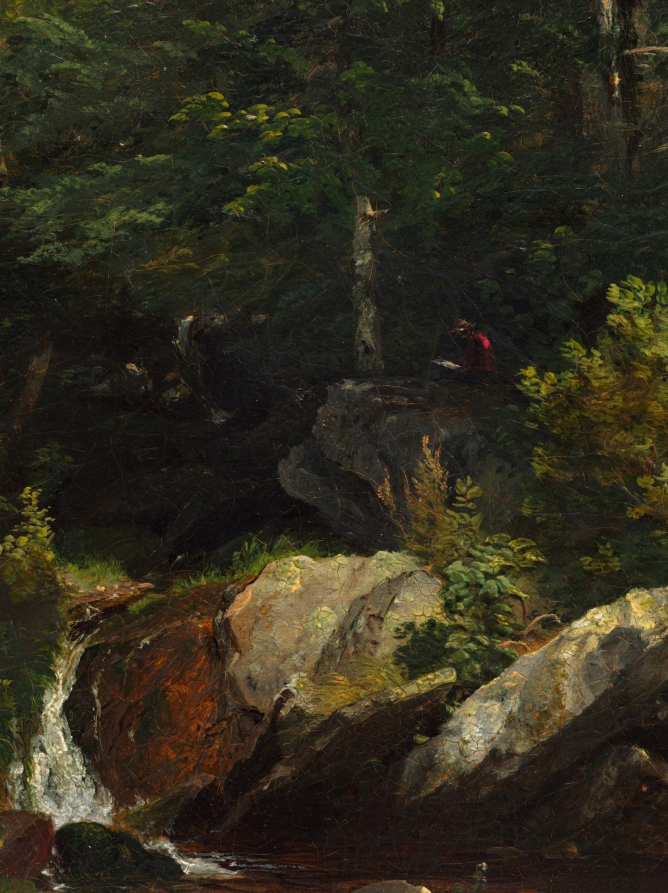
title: Trees and a Stream on a Hillside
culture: America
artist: Jasper F. Cropsey (American, 1823–1900)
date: 1853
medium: oil on board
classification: Painting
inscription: Signed lower left: "J. F. Cropsey / 1853"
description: This oil sketch was probably made on a trip through Massachusetts in the summer of 1853.